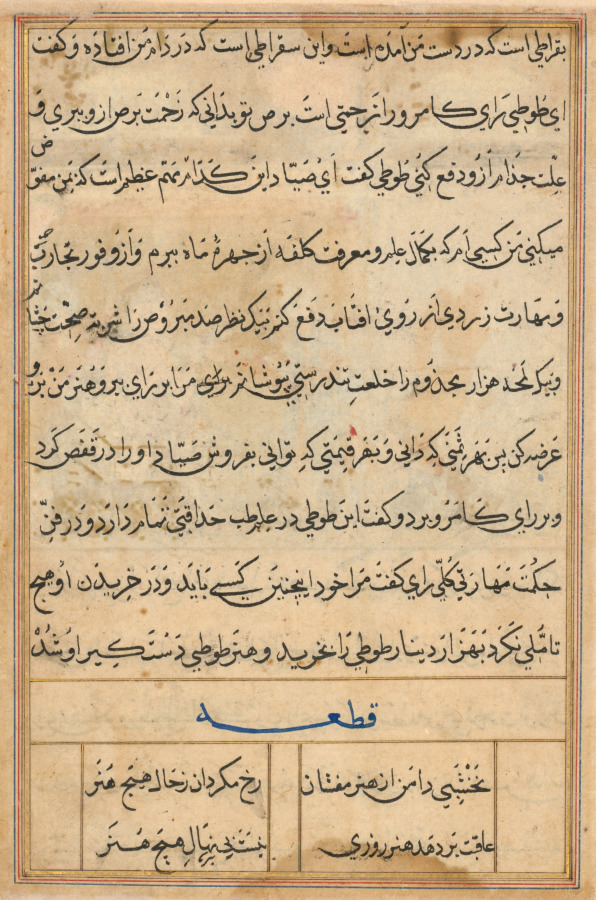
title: Page from Tales of a Parrot (Tuti-nama): text page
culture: Mughal India, court of Akbar (reigned 1556–1605)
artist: attributed to Basavana (Indian, active c. 1560–1600)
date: c. 1560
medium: gum tempera, ink, and gold on paper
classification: Painting